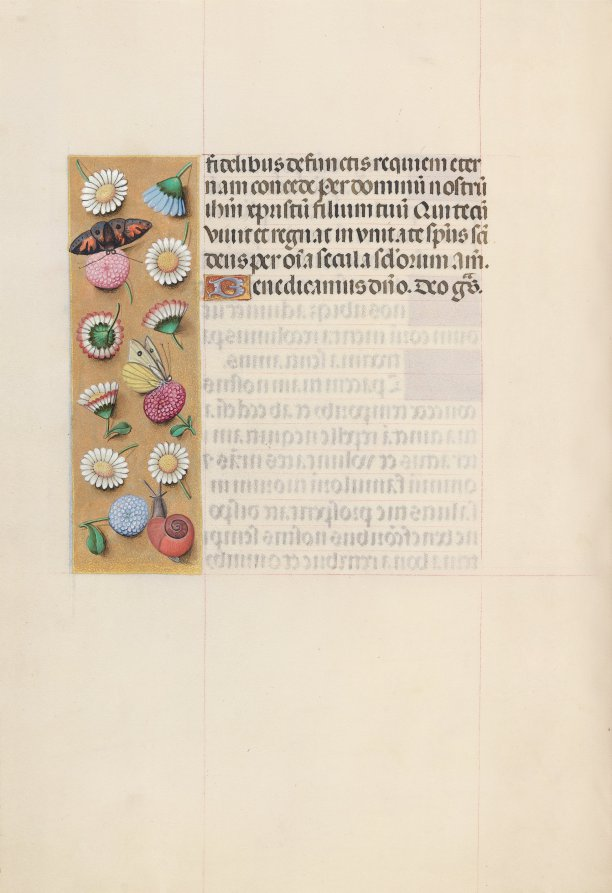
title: Hours of Queen Isabella the Catholic, Queen of Spain: Fol. 135v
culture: Flanders, Ghent and Bruges, late 15th century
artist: Master of the First Prayerbook of Maximillian (Flemish, c. 1444–1519)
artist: and Associates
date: c. 1500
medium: ink, tempera, and gold on vellum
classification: Bound Volume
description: This manuscript was illuminated by a circle of at least five highly organized manuscript painters active in the Flemish cities of Ghent and Bruges. The principal illuminator was Alexander Bening, who painted the majority of the book's miniatures. Manuscripts produced by this circle of artists are renowned for the decoration of their borders, which typically feature a rich variety of realistically-painted flowers, birds, and butterflies. This prayer book, called a book of hours, was intended not for a cleric, but for the private devotions of a lay person-in this case, Isabella the Catholic, Queen of Spain (1451-1504). Isabella's coat of arms embellishes the book's frontispiece. It is unlikely that the book was commissioned by the Queen herself; rather, she probably received it as a diplomatic gift from someone courting her patronage, perhaps Cardinal Francisco Jimenez de Cisneros. A Franciscan friar, Jimenez was dependent upon Isabella for his advancement, first to the post of Queen's confessor in 1492, and then to Archbishop of Toledo in 1495.